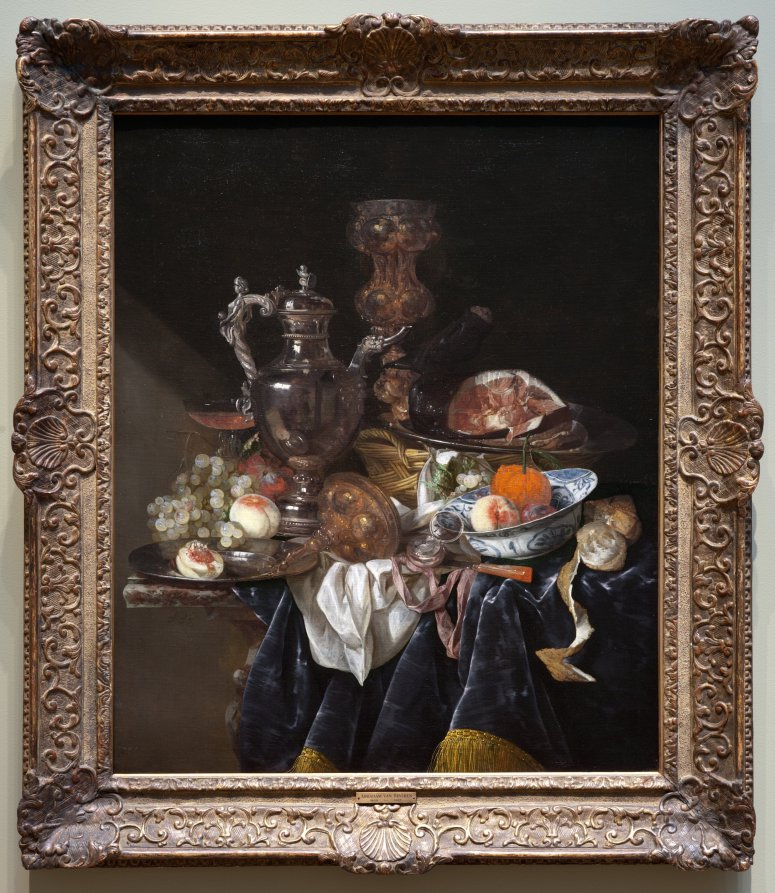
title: Silver Wine Jug, Ham, and Fruit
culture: Netherlands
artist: Abraham van Beyeren (Dutch, 1620/21–1690)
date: c. 1660–66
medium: oil on canvas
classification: Painting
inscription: Signed lower left: "AVB g. [monogram]"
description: With their typically large scale, and loose and energetic brushwork, Abraham van Beyeren’s opulent still life paintings were designed to be seen from a slight distance—perhaps installed over a mantelpiece. Here, for example, the silver wine jug is painted with rough strokes that seem almost abstract when viewed up close, but from a distance it becomes a fully realized object shimmering with complex reflections—including a ghostly self-portrait of the artist at his easel.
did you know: Look closely: the shimmering surface of the silver wine jug reflects a portrait of the artist at his easel.